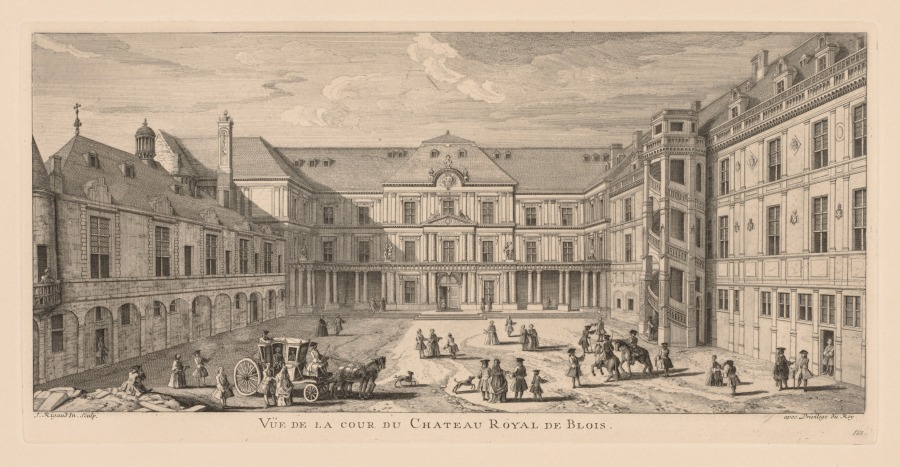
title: Vue de la cour du Château de Blois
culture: France, 18th century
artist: Jacques Rigaud (French, 1681–1754)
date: c. 1720–50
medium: engraving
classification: Print